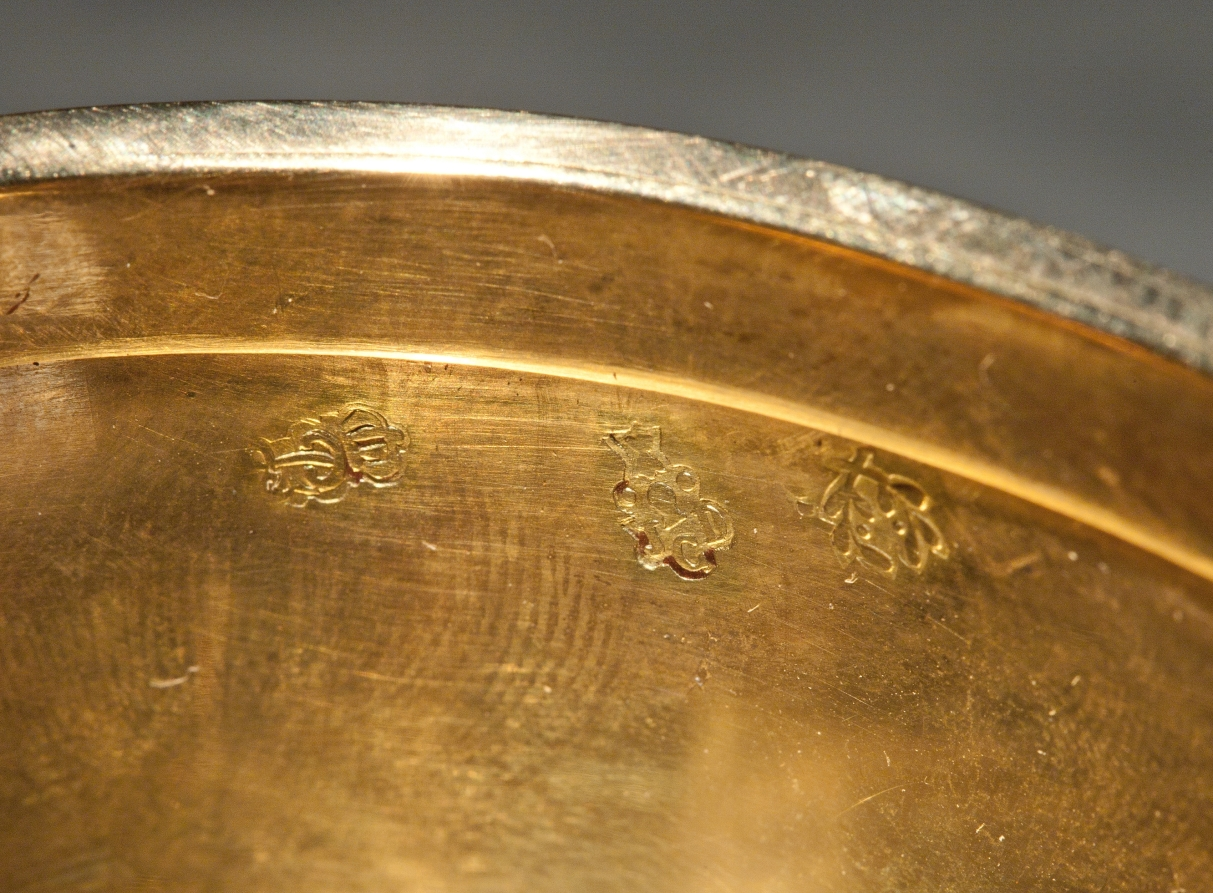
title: Snuff Box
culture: France, Paris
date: c. 1880–1900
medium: gold, enamel, agate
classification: Miscellaneous